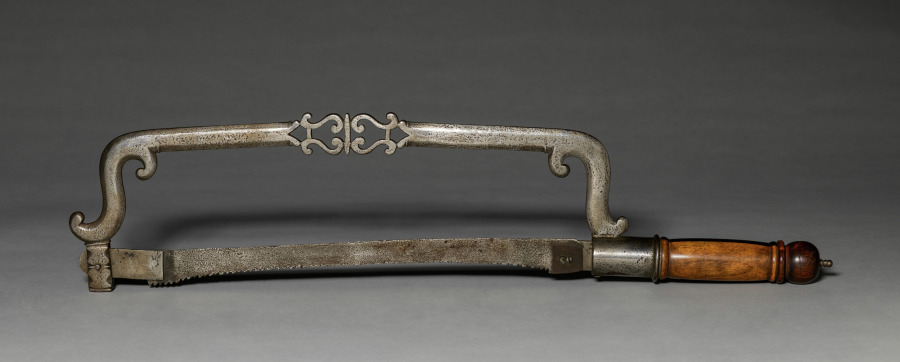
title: Hand Saw with Blade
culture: Europe, 18th century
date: 1700s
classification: Tool